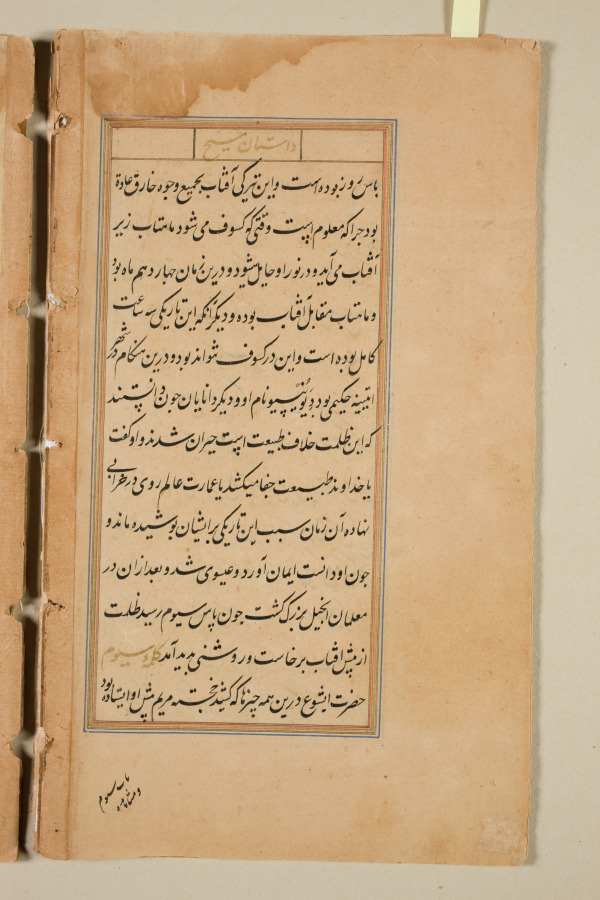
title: Text page from a Mirror of Holiness (Mir’at al-quds) of Father Jerome Xavier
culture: Mughal India, Allahabad, made for Prince Salim (1569–1627)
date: 1602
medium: Ink and gold on paper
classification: Manuscript